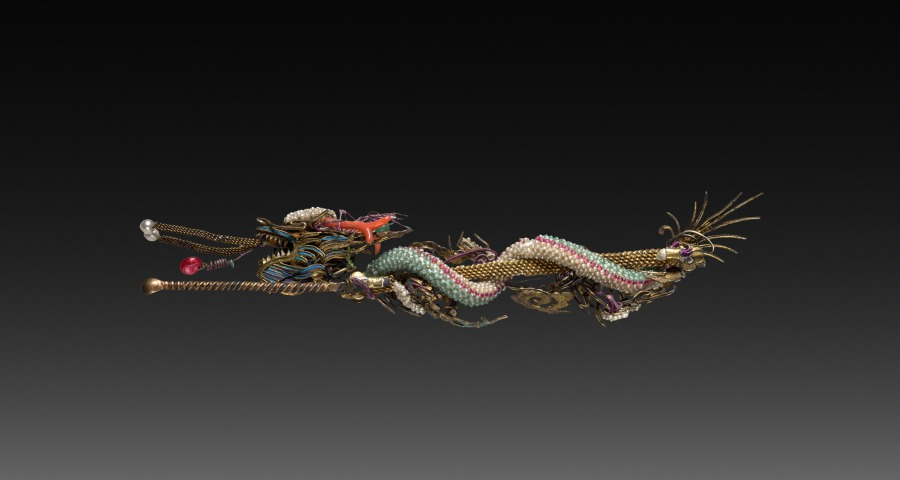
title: Ear Cleaner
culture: China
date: early 1900s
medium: seed pearls and wire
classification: Jewelry